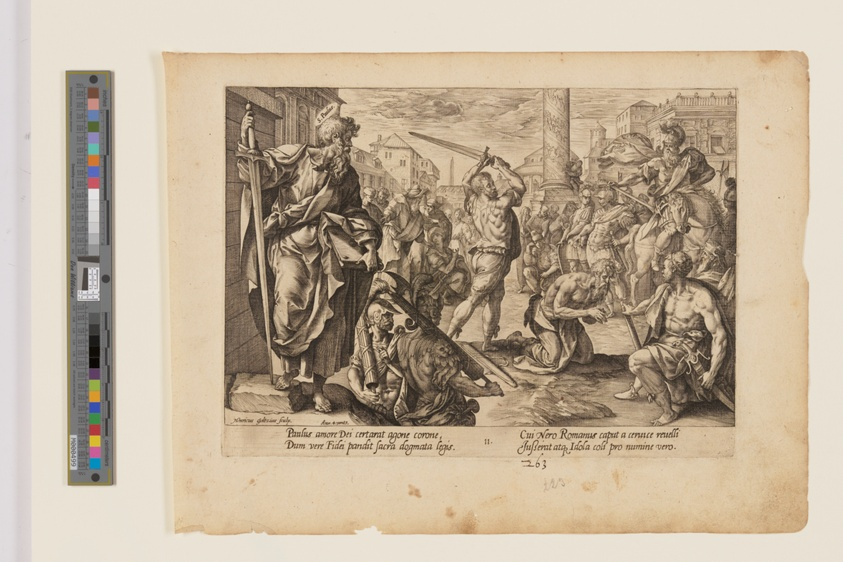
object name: Print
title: The Martyrdom of St Paul, from The Martyrdom of Christ and the Apostles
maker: Hendrick Goltzius (Dutch, 1558–1617); after Maarten de Vos (Flemish, 1532–1603); published Hieronymus Cock (Netherlandish, c. 1510–1570)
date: c. 1578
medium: Engraving on ivory laid paper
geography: Netherlands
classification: engraving; paper; print; prints and drawing